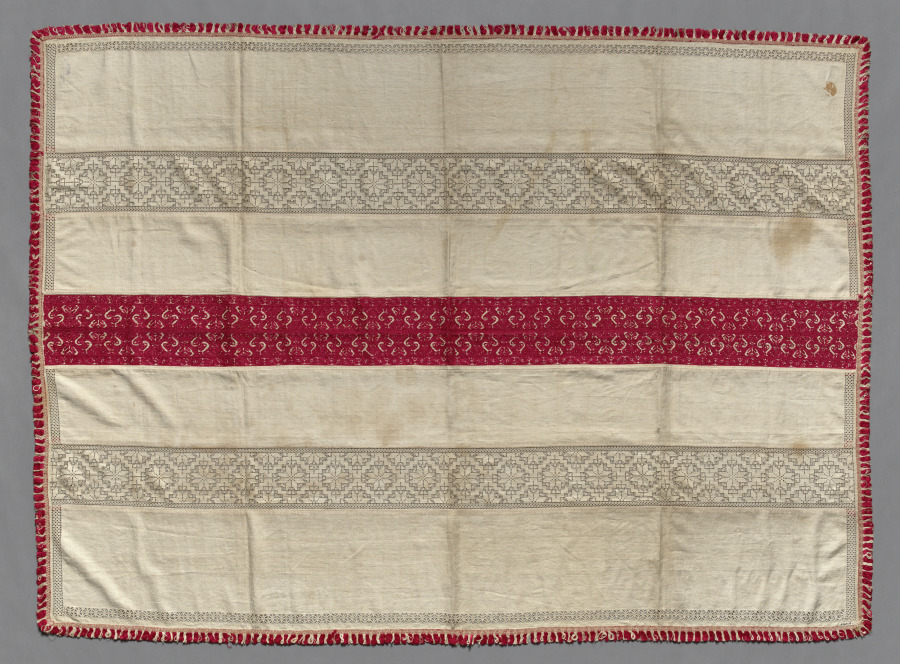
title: Embroidered Table Cover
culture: Italy, 17th century (or later copy)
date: 1600s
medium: embroidery; silk on linen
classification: Embroidery